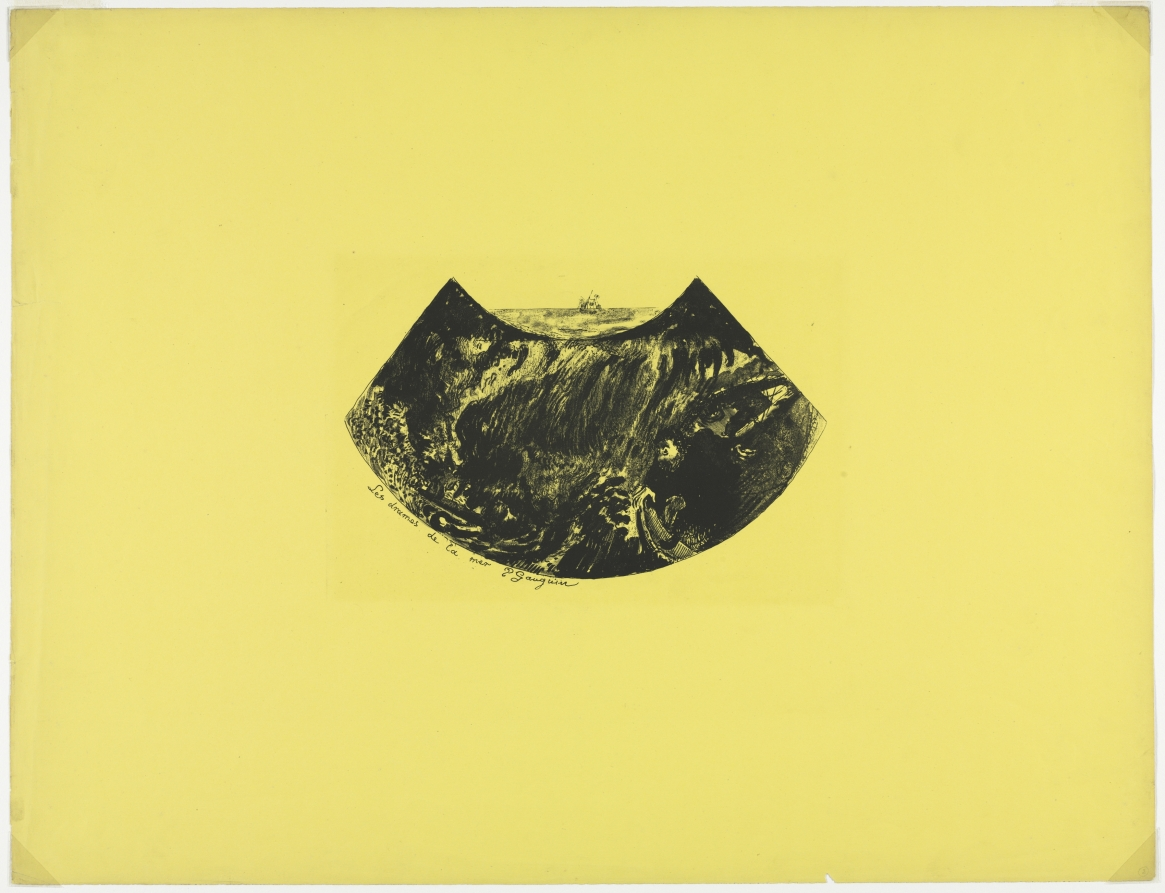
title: Volpini Suite: Dramas of the Sea (Les Drames de la Mer)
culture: France, 19th century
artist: Paul Gauguin (French, 1848–1903)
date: 1889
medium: zincograph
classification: Print